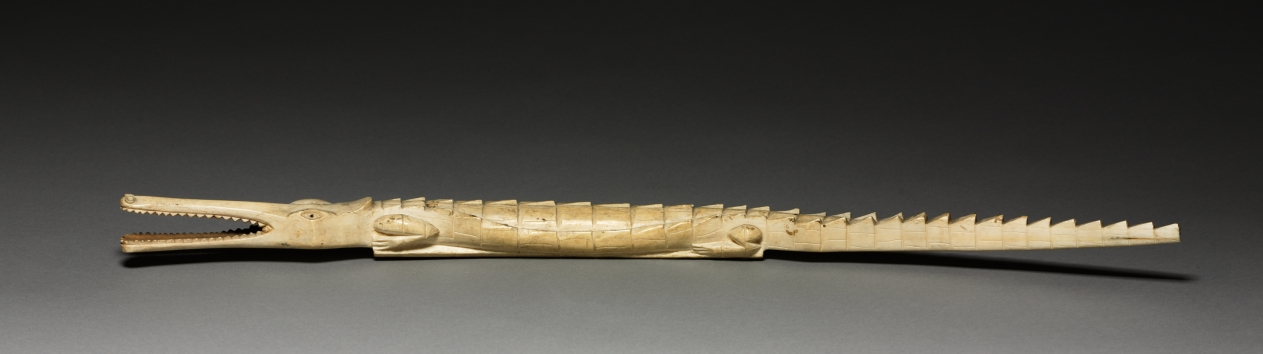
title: Alligator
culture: Africa, Central Africa, Democratic Republic of Congo, unknown maker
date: 1900s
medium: Elephant ivory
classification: Sculpture